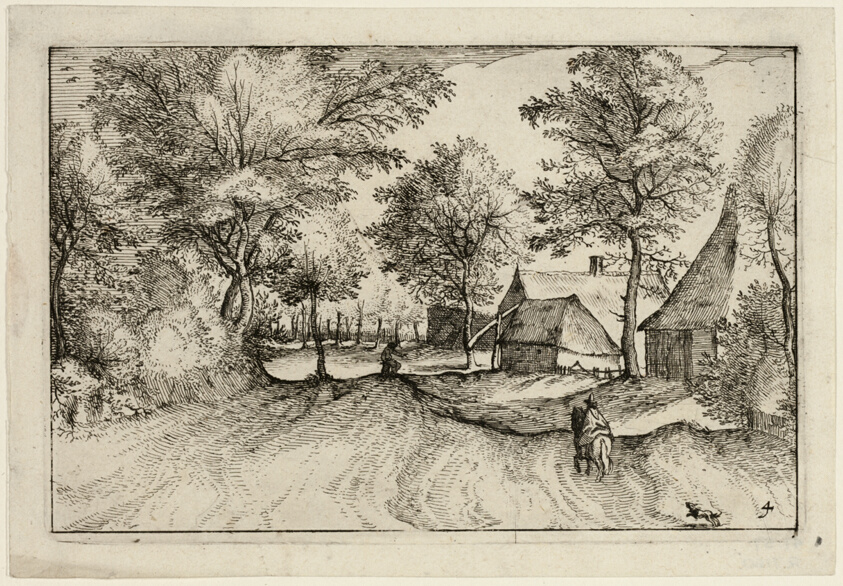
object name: Print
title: Village Road, plate four after Pictures of Farms, Country Houses and Rustic Villages (Praediorum villarum et rusticarum casularum icones)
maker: Claes Jansz. Visscher (Dutch, 1587-1652); after Unknown Flemish Artist, misidentified as Pieter Bruegel, the elder (Flemish, 1525/30-1569)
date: 1612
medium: Etching in black on ivory laid paper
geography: Netherlands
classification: etching; print; prints and drawing